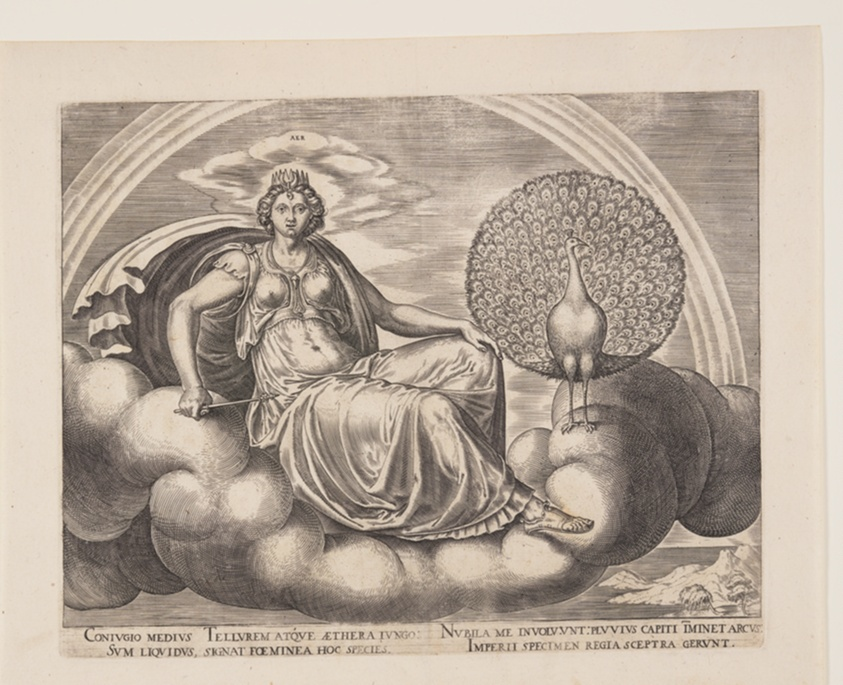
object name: Print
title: Air, from The Four Elements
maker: Philip Galle; Flemish, 1537–1612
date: 1564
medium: Engraving on ivory laid paper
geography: Flanders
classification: engraving; paper; print; prints and drawing